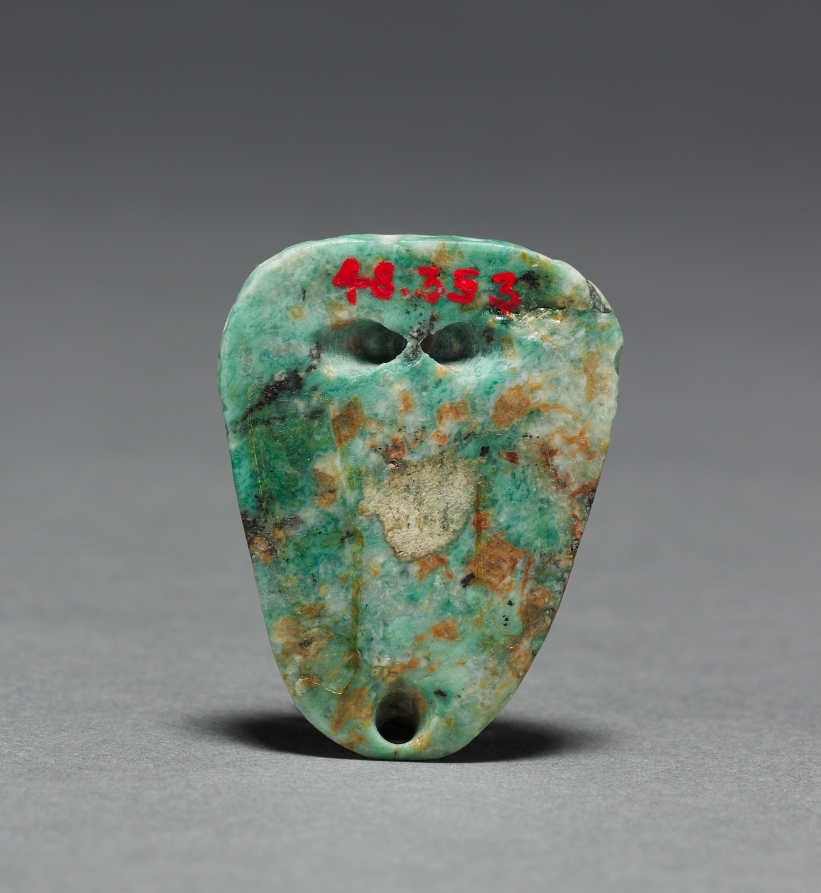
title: Mask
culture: Mexico, Mixtec, Monte Alban V, 14th-16th century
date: 1300–1521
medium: jadeite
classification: Jade